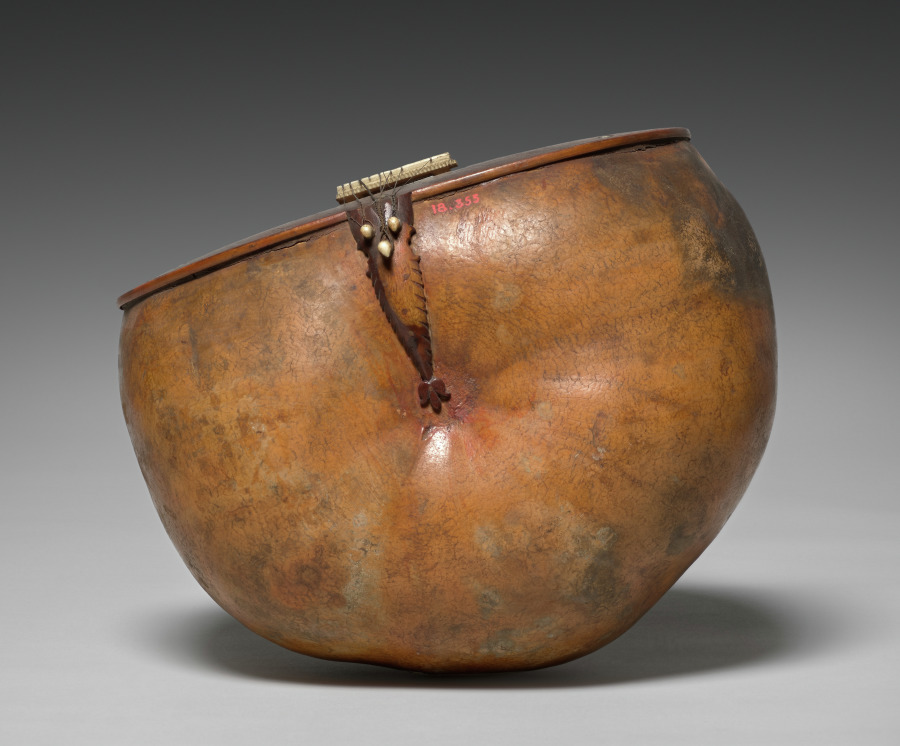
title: Sitar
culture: East India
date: 1800s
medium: Gourd, wood, ivory inlay, ebony? inlay, gut, and metal strings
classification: Musical Instrument